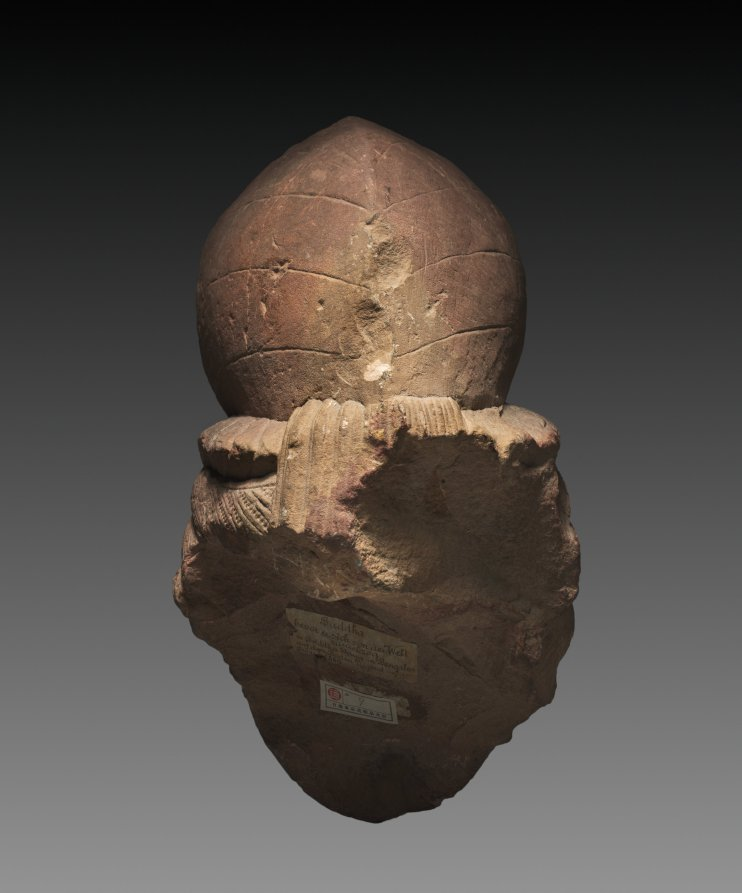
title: Head of a Bodhisattva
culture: India, Mathura, Kushan period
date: 75–early 100s CE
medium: red sandstone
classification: Sculpture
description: This monumental male head must have originally belonged to a larger-than-life Bodhisattva image. The imposing turban is of the type worn by royalty, divinities, and nobility during the Kushan period from the first through third century. The round, fleshy face, heightened by a subtle smile, retains the powerful quality of early Kushan and pre-Kushan images of nature divinities, known as yakshas.